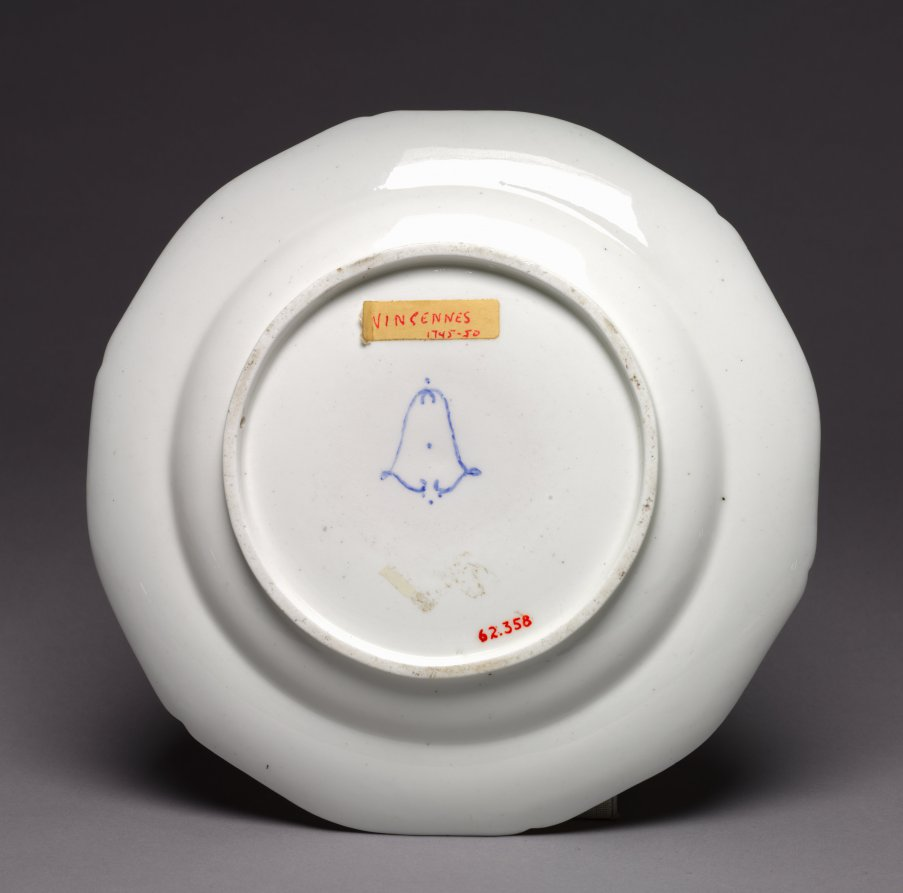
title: Plate (Assiette à cordonnet)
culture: France, Sèvres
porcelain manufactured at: Sèvres Porcelain Factory (French, est. 1756)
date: c. 1752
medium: soft-paste porcelain with enamel and gilt decoration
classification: Ceramic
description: The paintings and designs of François Boucher were reproduced regularly at the Vincennes Porcelain Factory. This image of Bacchus, the Roman god of wine and revelry, depicted on this plate in the form of a winged cupid, was likely inspired by Boucher’s models. Representations of children in monochromatic color schemes, as seen here, were known in France as enfants camïeux and popularly decorated 18th-century French porcelain.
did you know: Madame de Pompadour, official mistress of French King Louis XV, bought 36 plates with this form and type of decoration on May 23, 1753, attesting to its popularity among French royals.